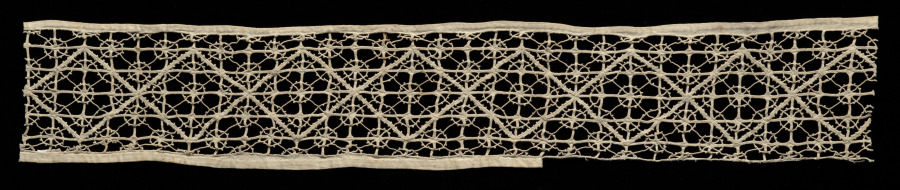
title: Lace Band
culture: Italy, 1700s-1800s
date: 1700s-1800s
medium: Linen: needle lace (Reticella)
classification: Lace